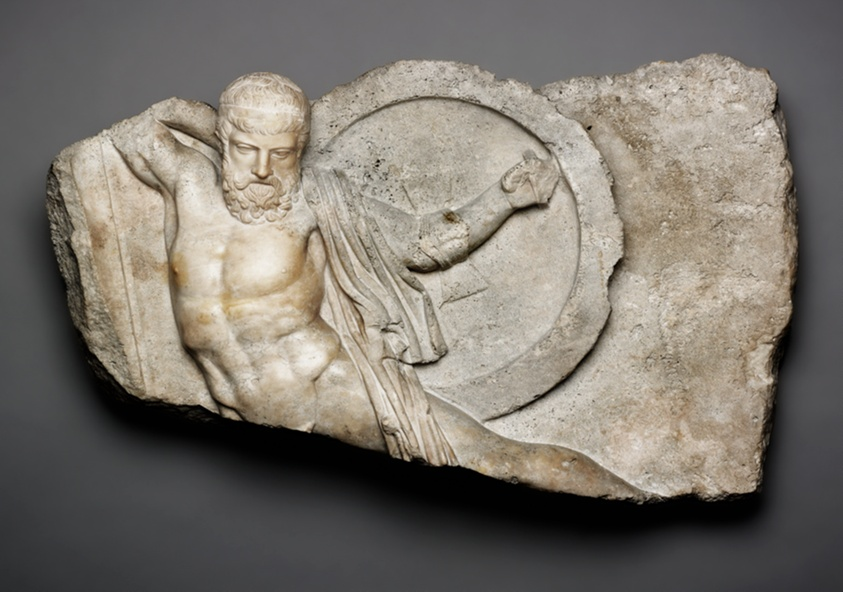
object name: Sculpture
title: Relief of a Falling Warrior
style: Classical, imperial (roman), ancient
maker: Roman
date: 2nd century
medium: Marble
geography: Piraeus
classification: sculpture; marble; stone; ancient art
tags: mythology